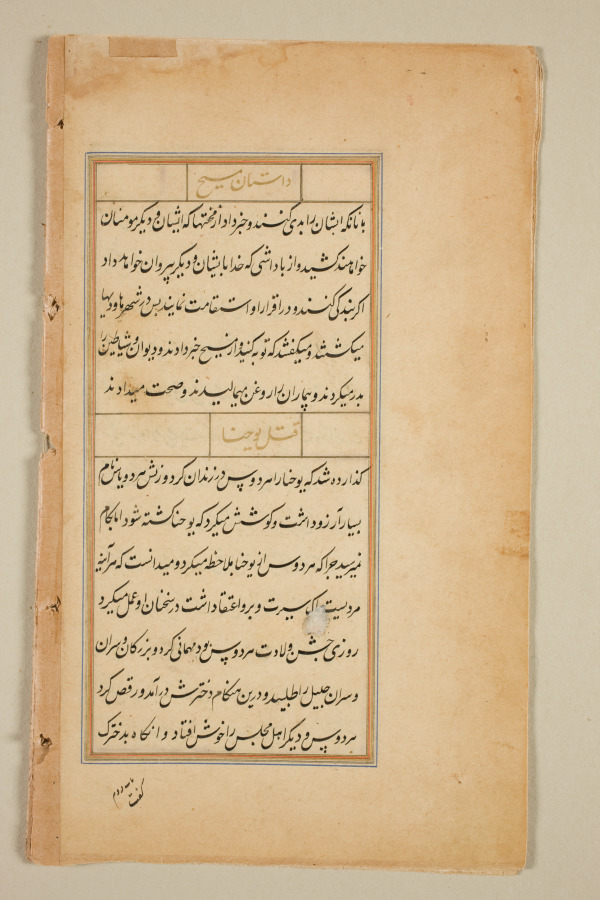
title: Text page from a Mirror of Holiness (Mir’at al-quds) of Father Jerome Xavier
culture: Mughal India, Allahabad, made for Prince Salim (1569–1627)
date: 1602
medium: Ink and gold on paper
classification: Manuscript